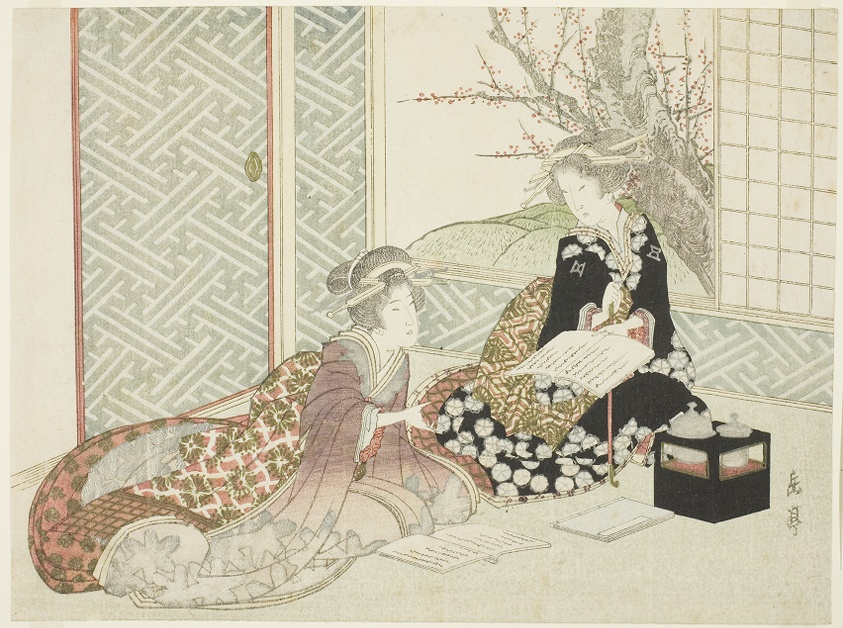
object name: Print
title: Two Women Reading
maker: Yashima Gakutei (Japanese, 1786 (?)-1868)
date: 19th century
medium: Color woodblock print; shikishiban, surimono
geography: Japan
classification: woodblock print; print; asian art